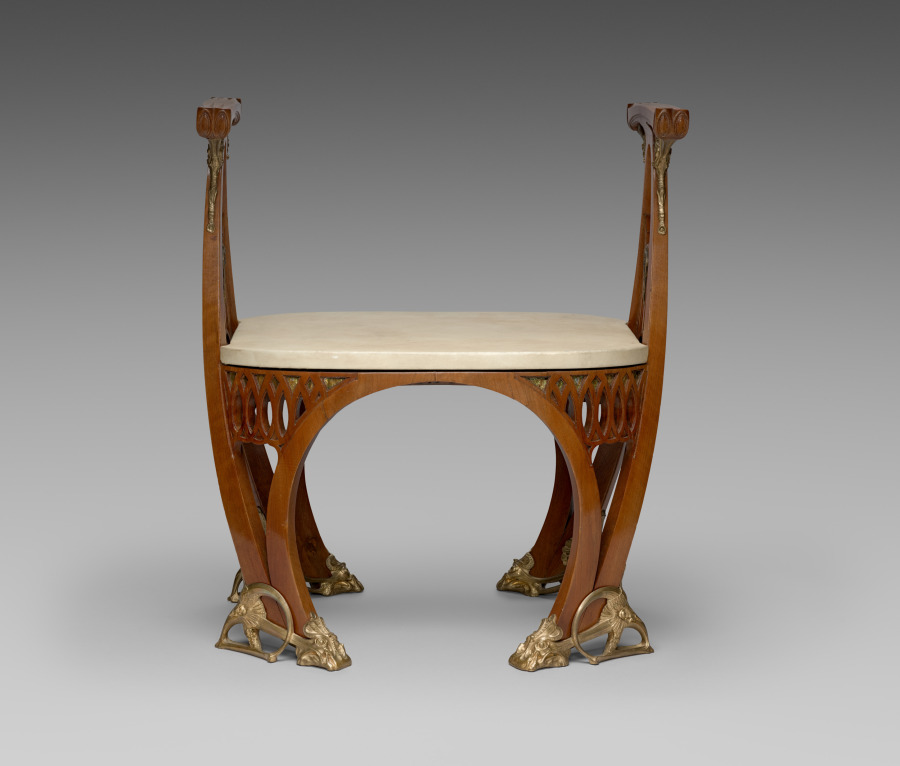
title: Tabouret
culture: France, Paris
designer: Carlo Bugatti (Italian, 1856–1940)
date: c. 1907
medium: Mahogany, parchment, gilt bronze, mother-of-pearl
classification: Furniture and woodwork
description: Although this tabouret is undocumented, its design, with its interlaced ovoid forms, gilt cast metal mounts, and mother-of-pearl inlays, is so close in style to the Cleveland Museum of Art’s celebrated tea table (1991.45) that it too can be assigned to Bugatti's Parisian period and dated about 1907.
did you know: Carlo Bugatti's son Ettore founded the luxurious car company Bugatti Automobiles.